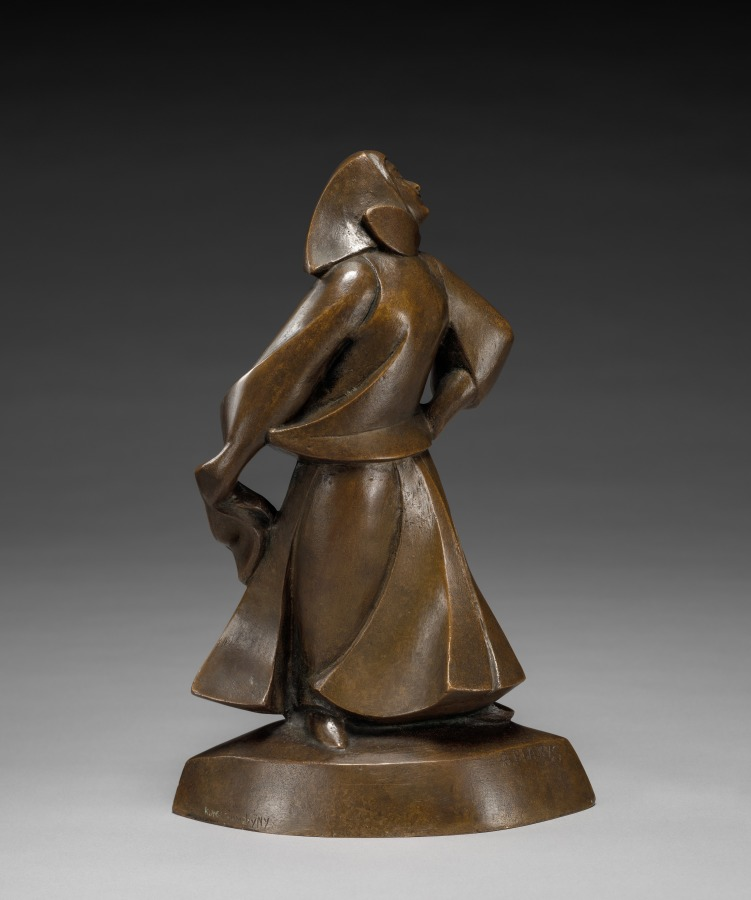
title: Russian Dancer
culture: America, Ohio, Cleveland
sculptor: Alexander Blazys (American, born Russian Empire [now Lithuania], 1894–1963)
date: 1925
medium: bronze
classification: Sculpture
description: A Lithuanian immigrant, Blazys introduced modernist sculpture to Cleveland upon his arrival in 1925. These figures merge rhythmic movement inspired by music with faceted, geometric planes derived from Cubism.